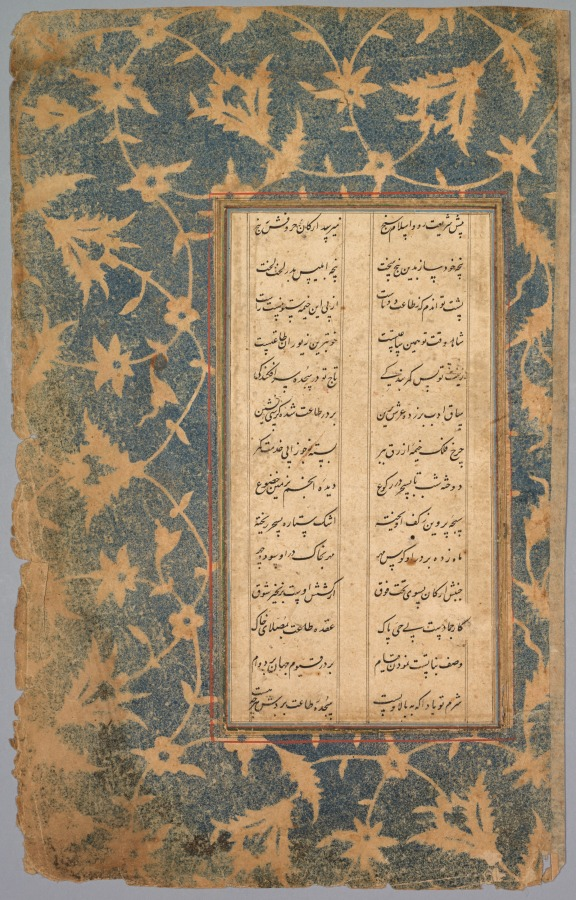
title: School Exercise Alphabet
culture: India, Mughal Dynasty (1526-1756)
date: 18th century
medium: ink on paper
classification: Manuscript